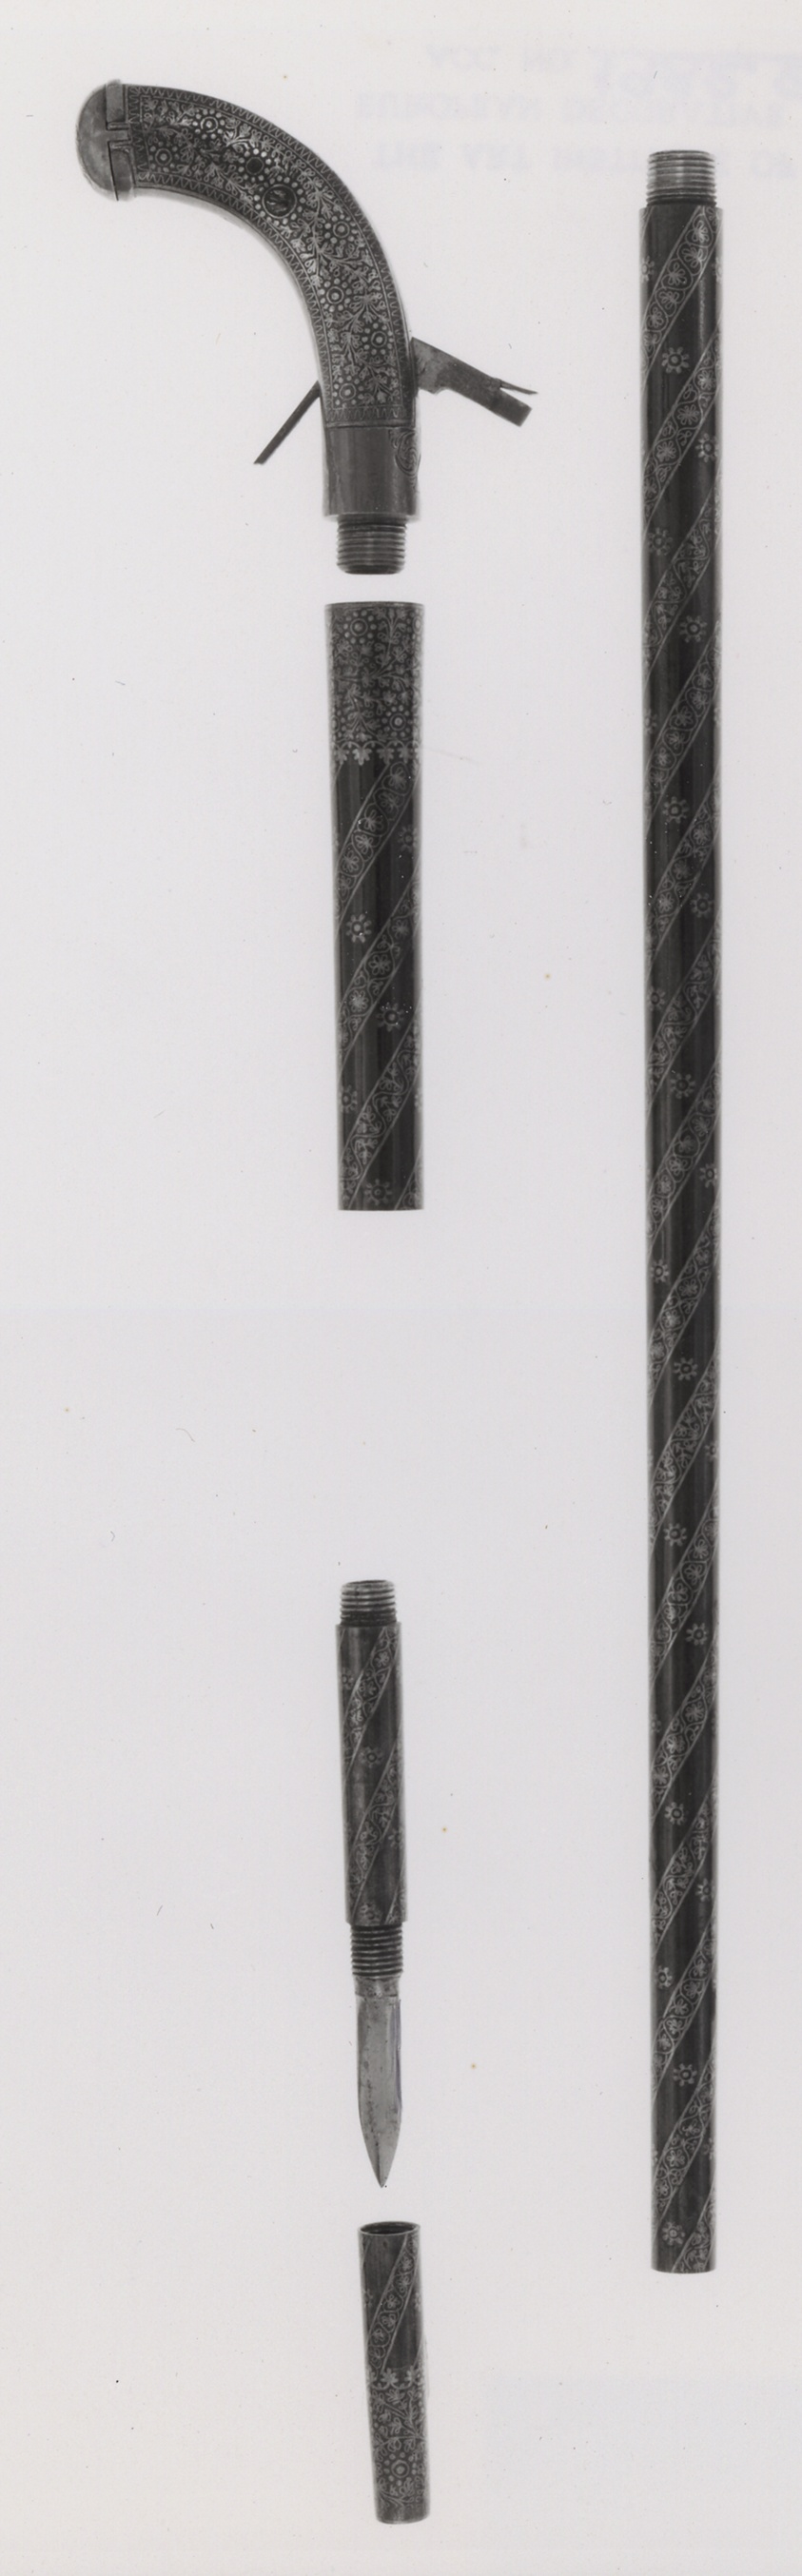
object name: Arms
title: Combined Walking-Cane, Gun, Pistol, Sword, and Dagger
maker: Indian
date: mid–19th century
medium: Wood, iron, steel, and silver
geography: India subcontinent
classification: combination weapon; arms; arms and armor